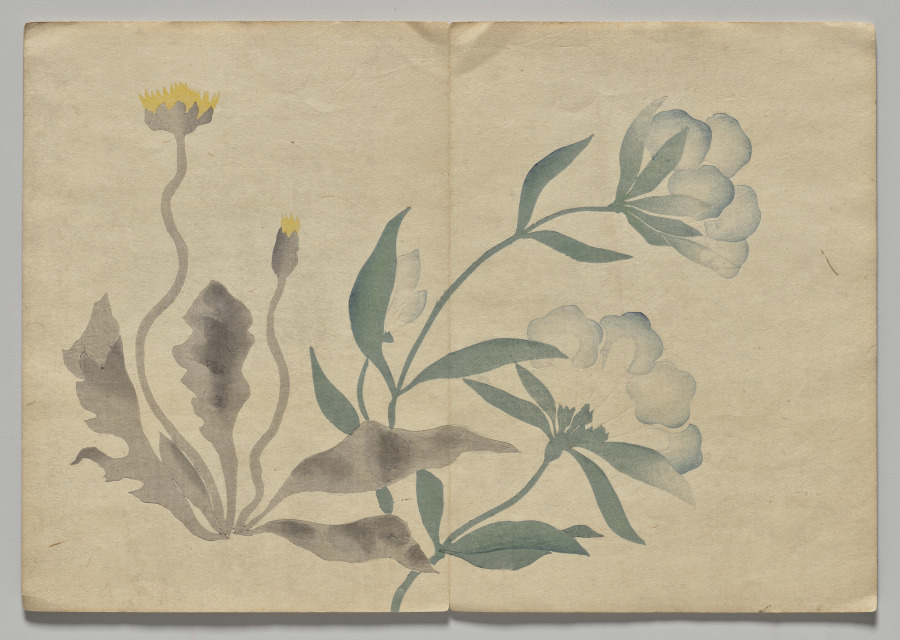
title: Scene from The Kōrin Picture Book (Volume 2)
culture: Japan, Edo period (1615–1868)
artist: Nakamura Hōchū (Japanese, d. 1819)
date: 1800s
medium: color woodblock printed book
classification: Bound Volume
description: Ogata Korin (1658-1716) was one of the most admired artists of Rimpa, or "decorative school painting." These books by the charming later-generation Rimpa artist Hochu record Korin's inventive designs.